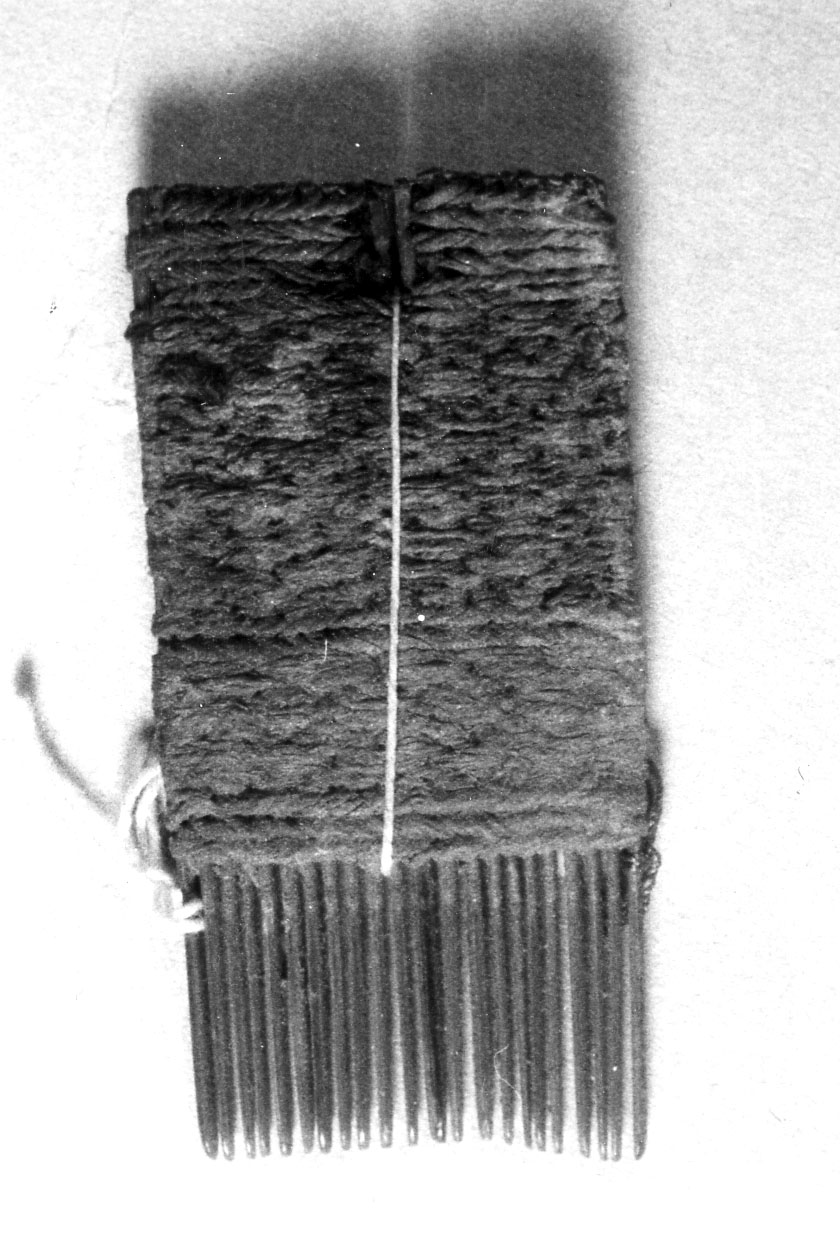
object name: Textile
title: Weaving Comb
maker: Peru, central coast, Rimac Valley, Possibly Santa Clara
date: A.D. 1000/1476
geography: Peru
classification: textile; textile working equipment; weaving; accessories (object genre)